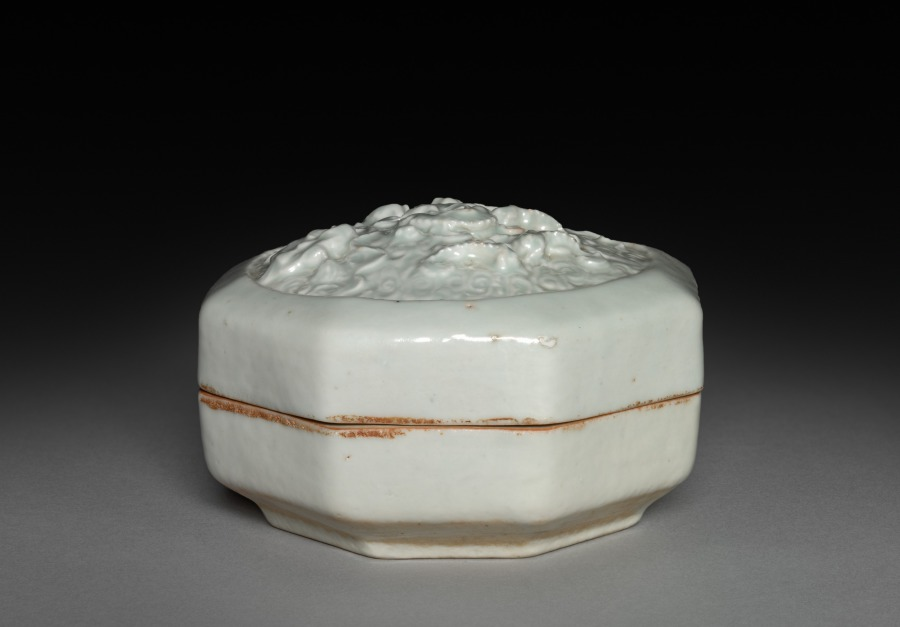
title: Hexagonal Covered Box with Lions in Relief: Qingbai Ware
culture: China, Jiangxi province, Jingdezhen kilns, Yuan dynasty (1271-1368)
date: 1300–1325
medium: glazed porcelain with molded and applied decoration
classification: Ceramic